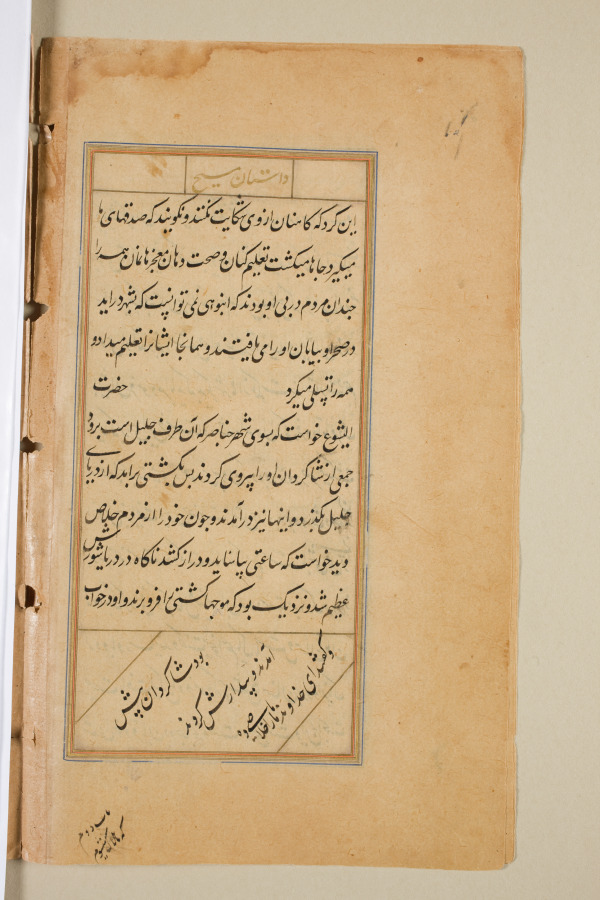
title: Text page from a Mirror of Holiness (Mir’at al-quds) of Father Jerome Xavier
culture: Mughal India, Allahabad, made for Prince Salim (1569–1627)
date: 1602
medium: Ink and gold on paper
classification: Manuscript